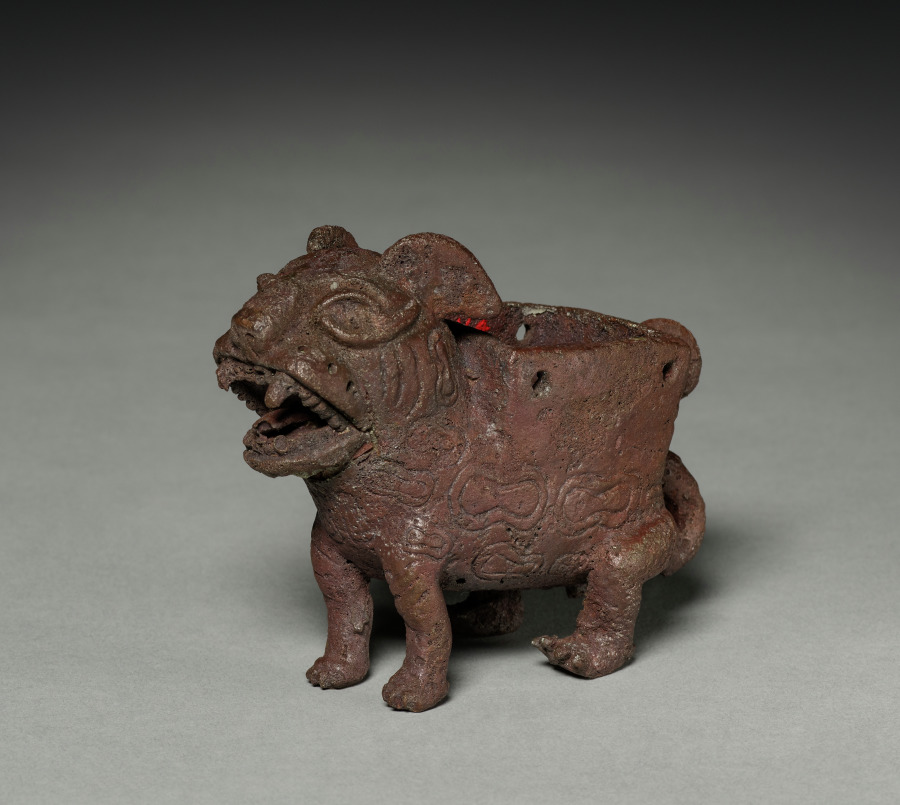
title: Male Feline-Shaped Container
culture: Peru, North Coast, Moche style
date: 50–800 CE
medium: cast copper alloy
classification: Sculpture